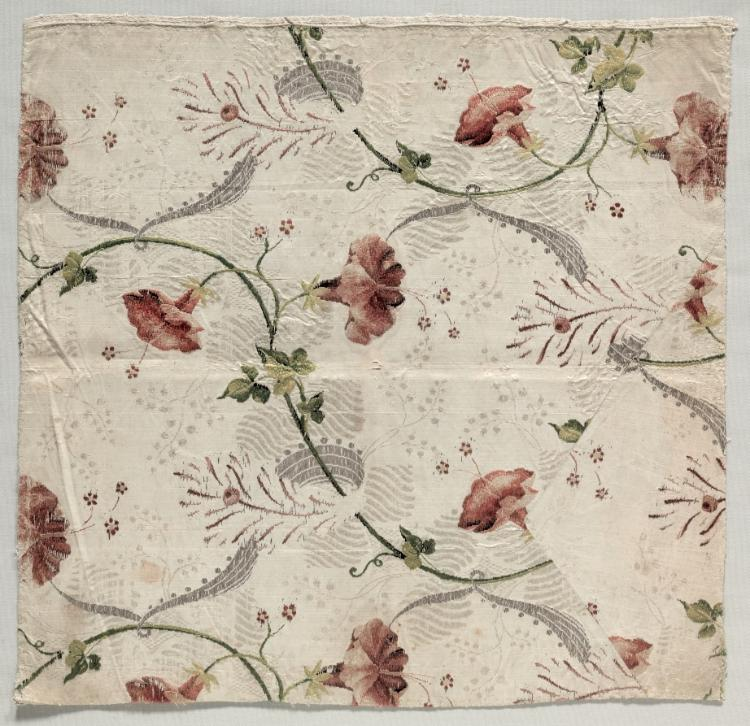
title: Brocaded Silk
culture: France, 18th century, Period of Louis XV (1723-1774)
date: 1723 – 1774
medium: brocade on tabby; silk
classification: Textile